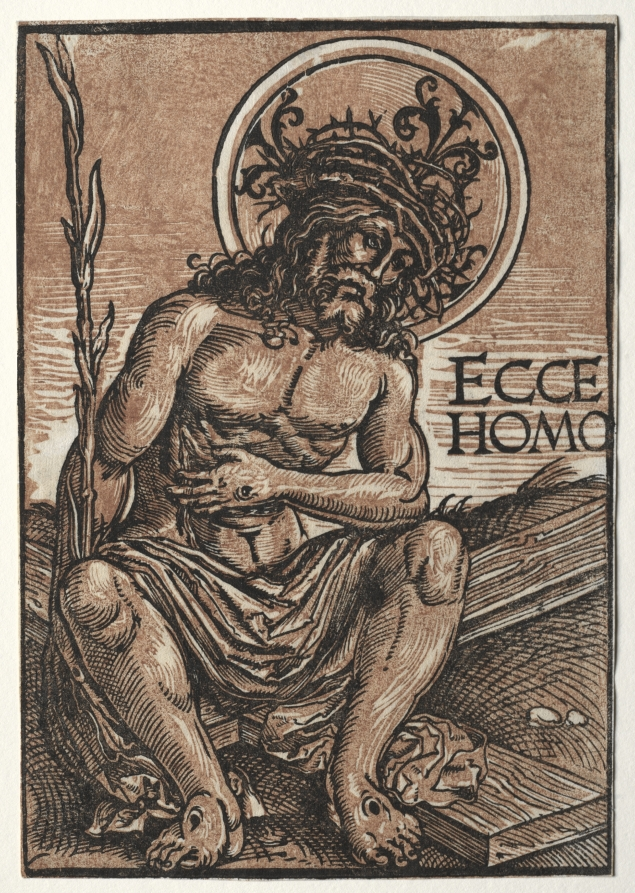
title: Man of Sorrows Seated on the Cross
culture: Germany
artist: Hans Weiditz (German, c. 1495-c. 1536)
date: c. 1522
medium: chiaroscuro woodcut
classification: Print